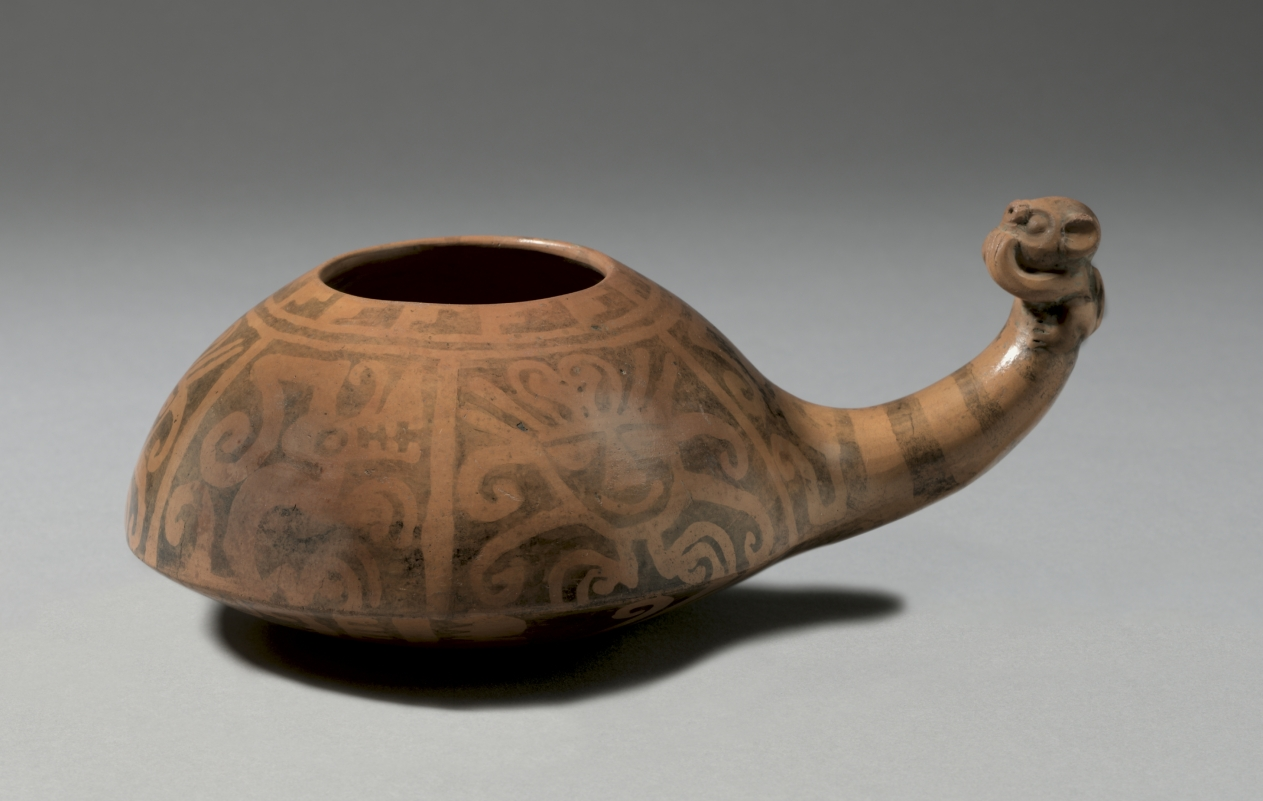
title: Dipper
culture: Peru, North Highlands, Recuay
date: 100 BCE–700 CE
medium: ceramic, slip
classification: Ceramic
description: Both of these objects feature a creature known as the "Recuay feline," although it could also refer to a fox, dog, or viscacha (a rodent). Whatever its identity, the prominent crest on its head ties it to the supernatural realm, a connection underlined by the deity head that also appears on the dipper and by the ritual function of snuff tablets, which were used to inhale hallucinogenic snuffs during religious ceremonies.